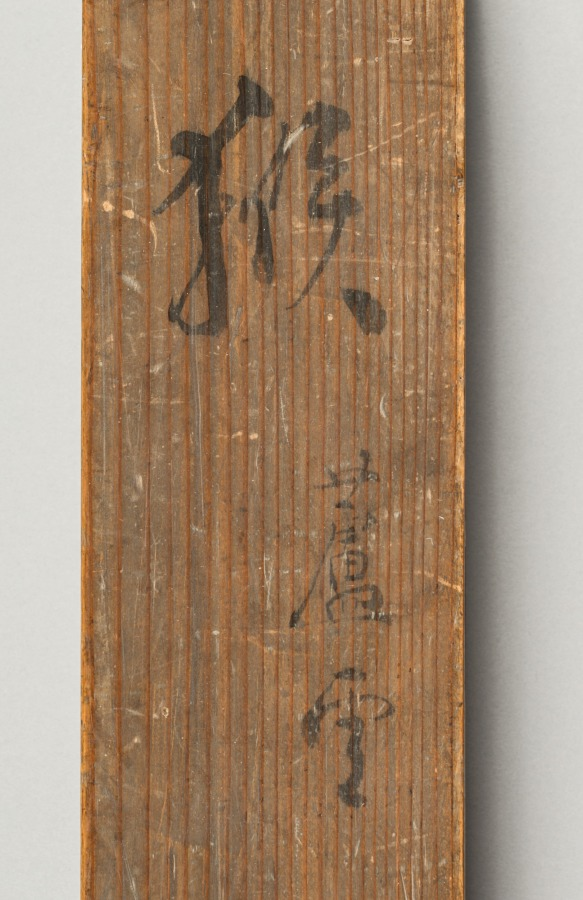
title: Monkeys by a Stream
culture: Japan, Edo period (1615–1868)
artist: Nagasawa Rosetsu (Japanese, 1754–1799)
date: c. 1796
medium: hanging scroll; ink and color on paper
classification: Painting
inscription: Inscription: 平安蘆雪寫意; Transliteration: Heian Rosetsu shai; Sealed: 魚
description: The two monkeys in this painting are Japanese macaques. The one in front dangles its left leg over a sharply angled rock, surveying the land beyond a fast-moving mountain stream. A smaller monkey sits behind it, looking directly ahead as if it realizes it is being watched. The artist used just a few highly contrasting warm and cool colors, sweeping brushstrokes over ink washes, and loose lines to create a scene that powerfully evokes the mentally engaged state of the two animals.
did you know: Monkeys, which are found throughout the mountainous and wooded areas of Japan, became a favorite subject of many later Japanese artists.